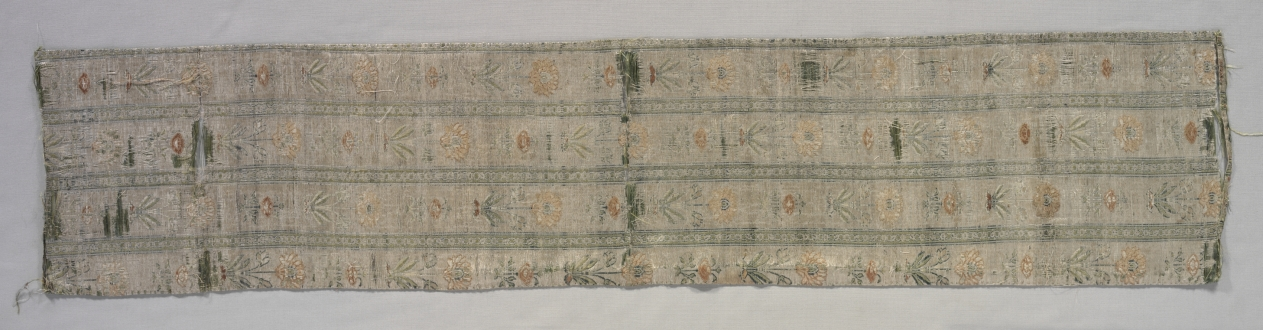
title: Surround for Turkish Silk Cushion Cover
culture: Iran, Safavid period (1501–1722)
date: early 1600s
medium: silk, silver-metal thread: plain weave with inner warps and with continuous and discontinuous supplementary wefts bound in plain and 1/3 Z twill order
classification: Textile